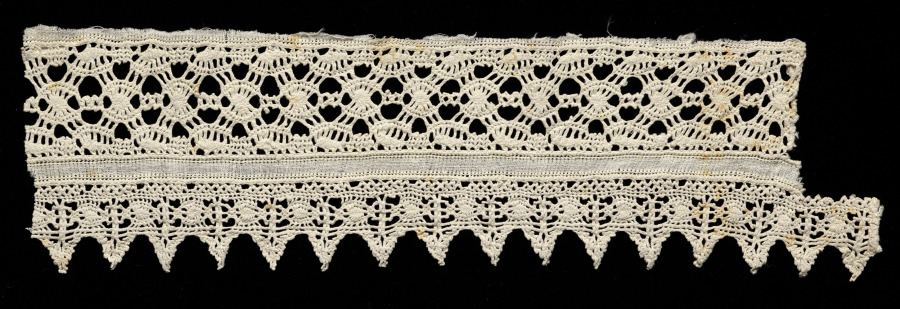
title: Lace Insertion and Edging of Points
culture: Italy, Umbria(?)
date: 1600s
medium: Bobbin lace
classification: Lace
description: This piece of Umbrian bobbin lace copies Venetian needle lace from the 1500s.